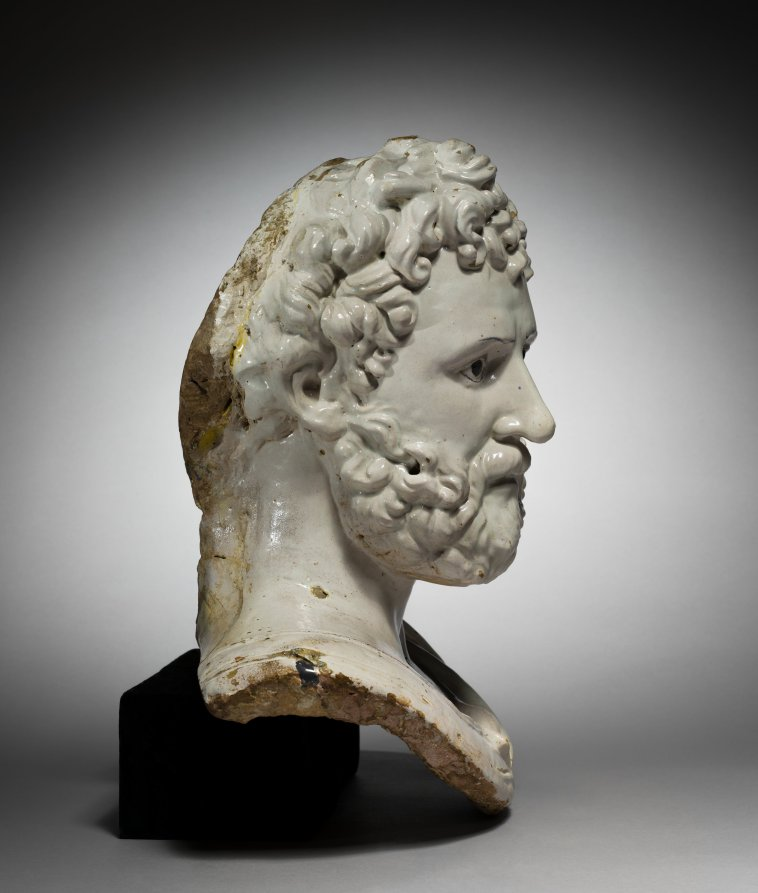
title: Bust of a Classical Hero or Emperor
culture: Italy, 16th century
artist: Girolamo della Robbia (Italian, 1488–1566)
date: early to mid 16th century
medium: glazed terracotta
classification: Sculpture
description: This bust most likely represents an emperor or condottiere from classical antiquity, and probably formed part of a series of classical heads. Such groups of worthies were featured as decorative schemes in the studioli and architectural projects of Renaissance statesmen. Attesting to the sophistication of their learned patrons, these busts also provided the opportunity for artists to explore the contemporary stylistic relevance of classical portraiture—a source of fascination and inspiration for Florentine sculptors of this period.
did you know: Head-and-shoulders portraits, known as busts, were popular from Roman times.